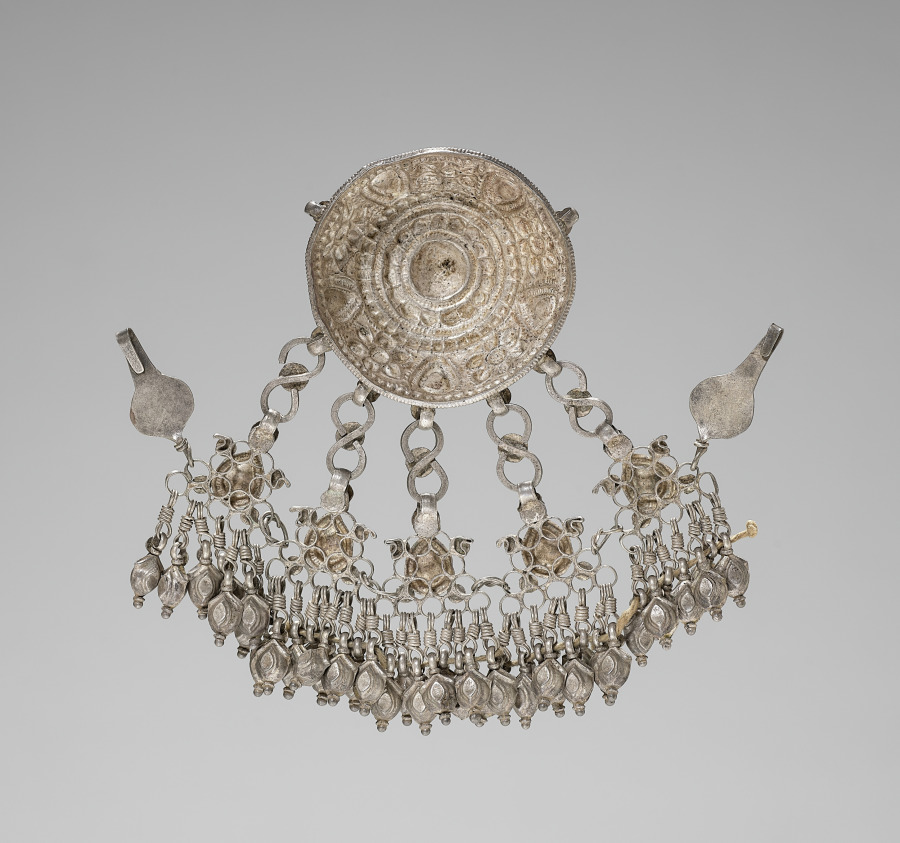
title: Breast Ornament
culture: India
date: 1800s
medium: silver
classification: Jewelry